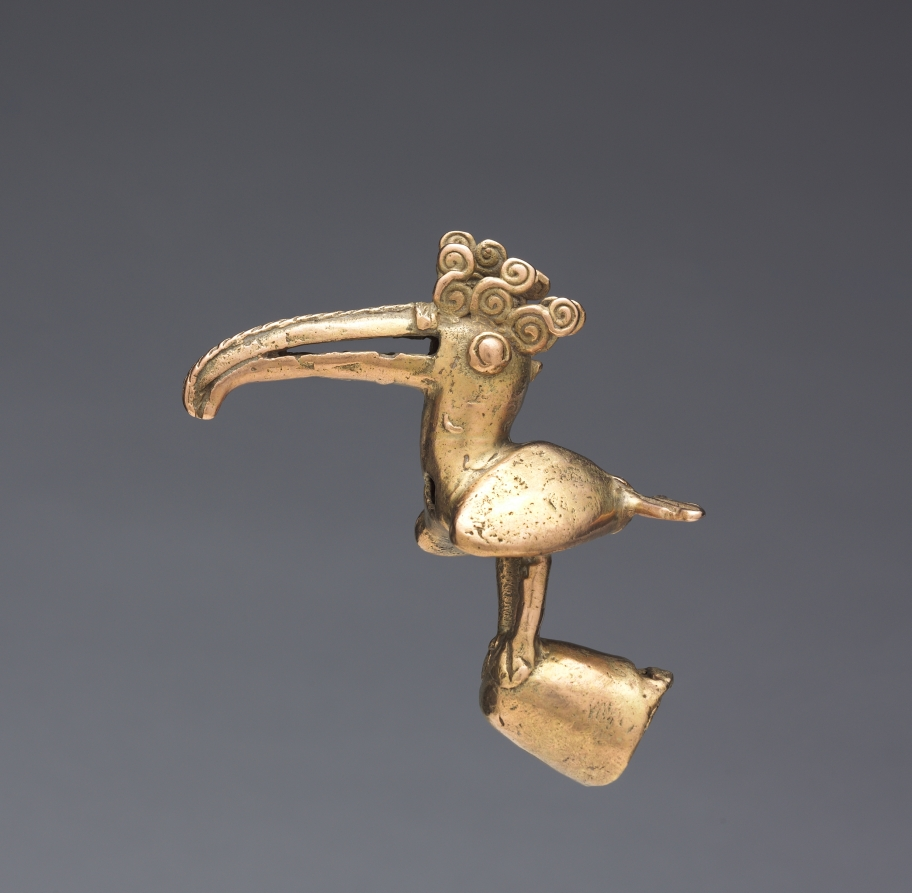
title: Staff Head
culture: Colombia, Sinú style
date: 400–1000 CE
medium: cast gold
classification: Metalwork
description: These finials probably fit over the ends of wooden staffs, emblems of rank. Unique to the Sinú area are finials with an image, often a bird, at a right angle to the base. This orientation suggests that the finials served as the finger grips of ceremonial spear throwers.